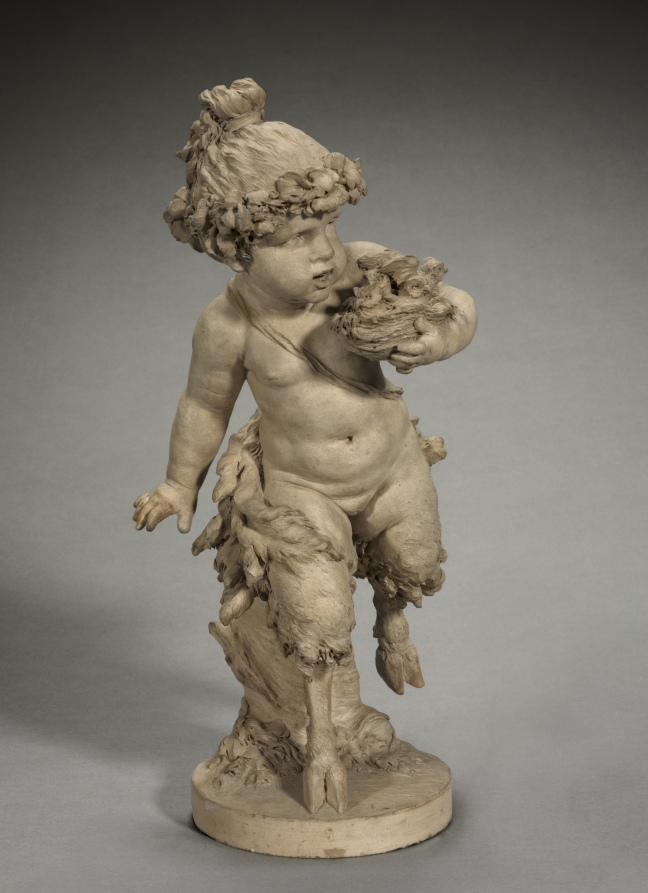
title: Young Satyress Running with an Owl's Nest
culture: France, 18th century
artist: Clodion (French, 1738–1814)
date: 1770s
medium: terracotta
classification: Sculpture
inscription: signature incised on back: CLODION.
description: These works by French sculptor Claude Michel, known as Clodion (1738–1814), shows a pair of young satyrs. Clodion was fond of depicting characters from classical antiquity in his work, and the subject of child or baby satyrs in Bacchanalian celebrations appear often in the work of Rococo artists. The female satyr wraps a plump arm around a nest filled with baby birds, while her male counterpart holds an owl. Balancing on one foot, the two flee the scene of their theft.